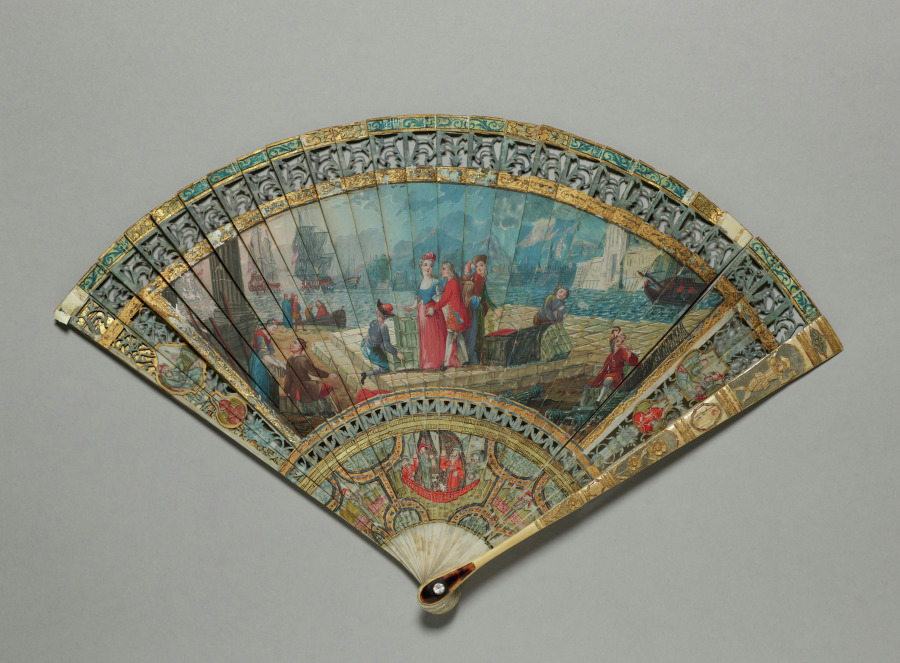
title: Brise Fan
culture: Italy ?, 18th century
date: c. 1725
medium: ivory, metal pin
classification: Miscellaneous